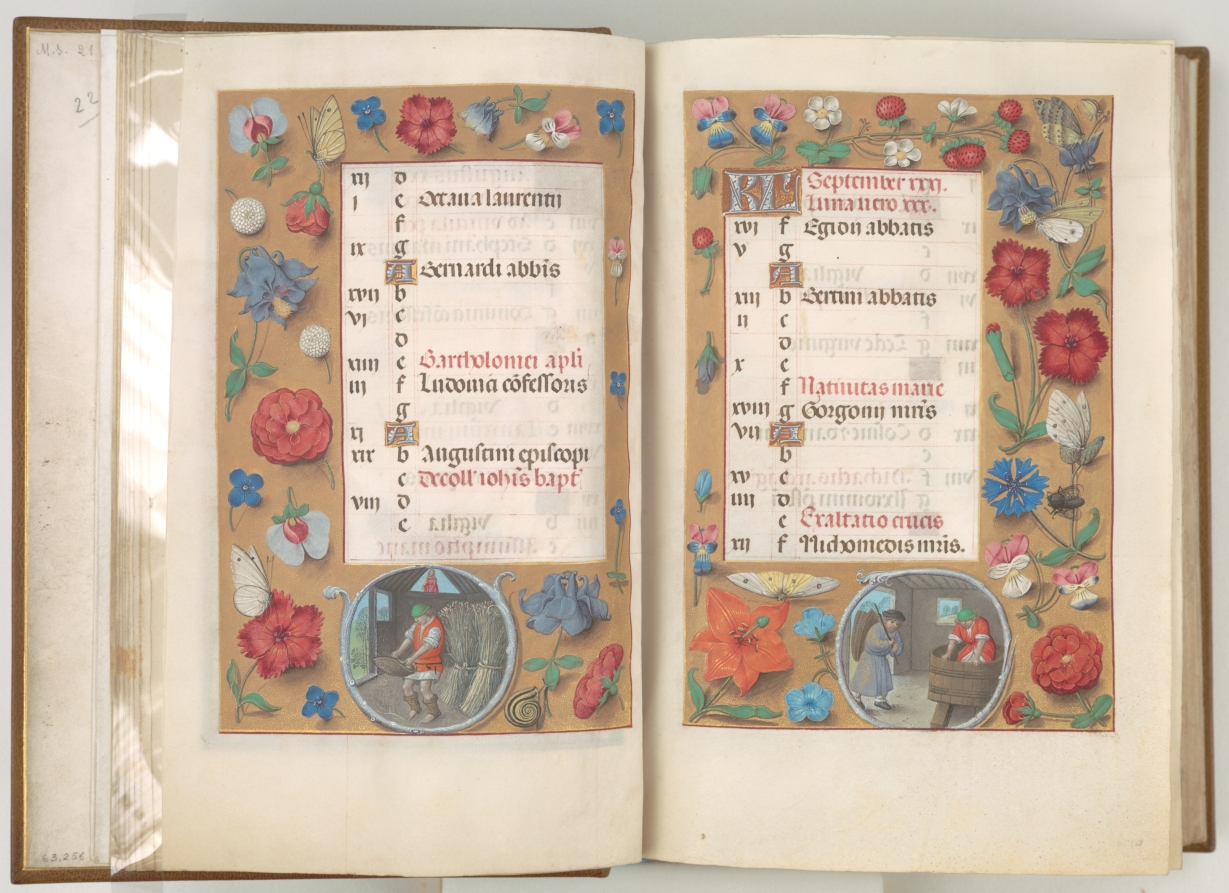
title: Hours of Queen Isabella the Catholic, Queen of Spain: Fol. 9v, August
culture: Flanders, Ghent and Bruges, late 15th century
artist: Master of the First Prayerbook of Maximillian (Flemish, c. 1444–1519)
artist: and Associates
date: c. 1500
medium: ink, tempera, and gold on vellum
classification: Bound Volume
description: This manuscript was illuminated by a circle of at least five highly organized manuscript painters active in the Flemish cities of Ghent and Bruges. The principal illuminator was Alexander Bening, who painted the majority of the book's miniatures. Manuscripts produced by this circle of artists are renowned for the decoration of their borders, which typically feature a rich variety of realistically-painted flowers, birds, and butterflies. This prayer book, called a book of hours, was intended not for a cleric, but for the private devotions of a lay person-in this case, Isabella the Catholic, Queen of Spain (1451-1504). Isabella's coat of arms embellishes the book's frontispiece. It is unlikely that the book was commissioned by the Queen herself; rather, she probably received it as a diplomatic gift from someone courting her patronage, perhaps Cardinal Francisco Jimenez de Cisneros. A Franciscan friar, Jimenez was dependent upon Isabella for his advancement, first to the post of Queen's confessor in 1492, and then to Archbishop of Toledo in 1495.